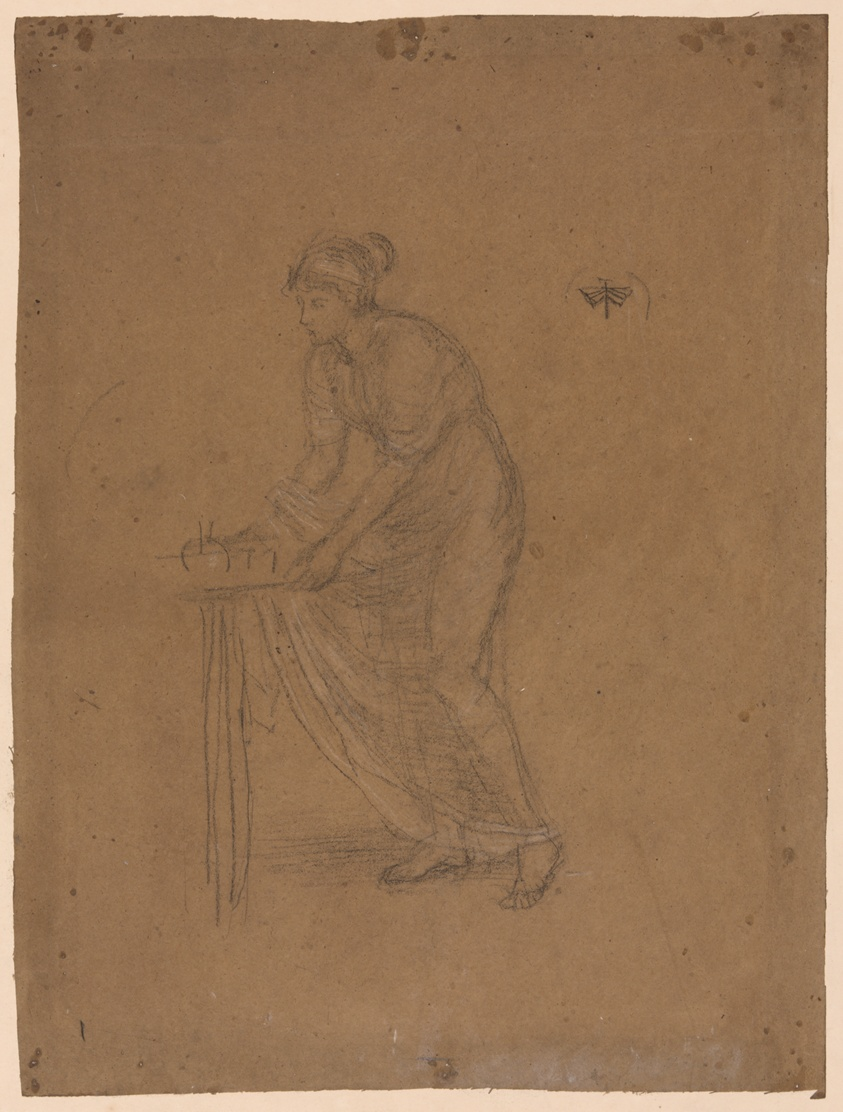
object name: Drawing and Watercolor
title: Draped Model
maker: James McNeill Whistler (American, 1834-1903)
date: 1866/69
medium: Black chalk with touches of white chalk, on brown wove paper laid down on ivory board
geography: United States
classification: chalk; drawings (visual works); prints and drawing; paper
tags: Century of Progress, world's fairs, Chicago World's Fairs